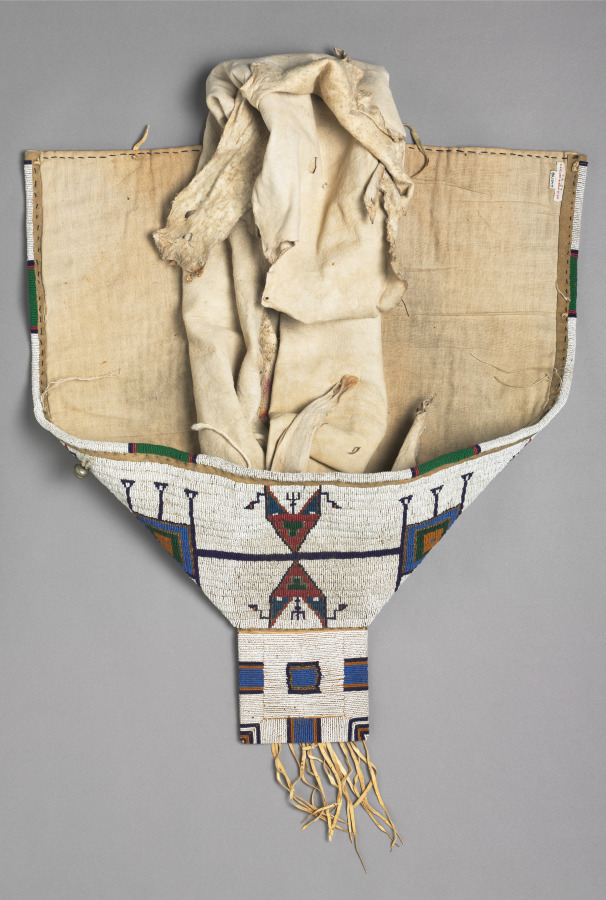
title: Cradle or Baby Carrier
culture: Native North America, Plains, Lakota (Sioux)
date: c. 1900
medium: Native-tanned hide, cotton cloth, glass beads, metal beads, brass bell, sinew thread, cotton thread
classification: Leather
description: Many Plains peoples hold lavishly quilled or beaded cradles in high esteem—they bestow spiritual benefits on the infant and prestige and honor on the family and the maker, usually a female relative. Indeed, today and in the past, creating such a cradle is often regarded as equal to counting coup, the ultimate act of male bravery in which a warrior touches an enemy with a stick known as a coup stick. This cradle was held in the arms; others have wooden frames that can be propped against a support, such as a sofa or a tree, to ease the baby’s socialization into the community.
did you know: In the past, young Plains children spent much of their time in cradles, which remain in occasional use today.